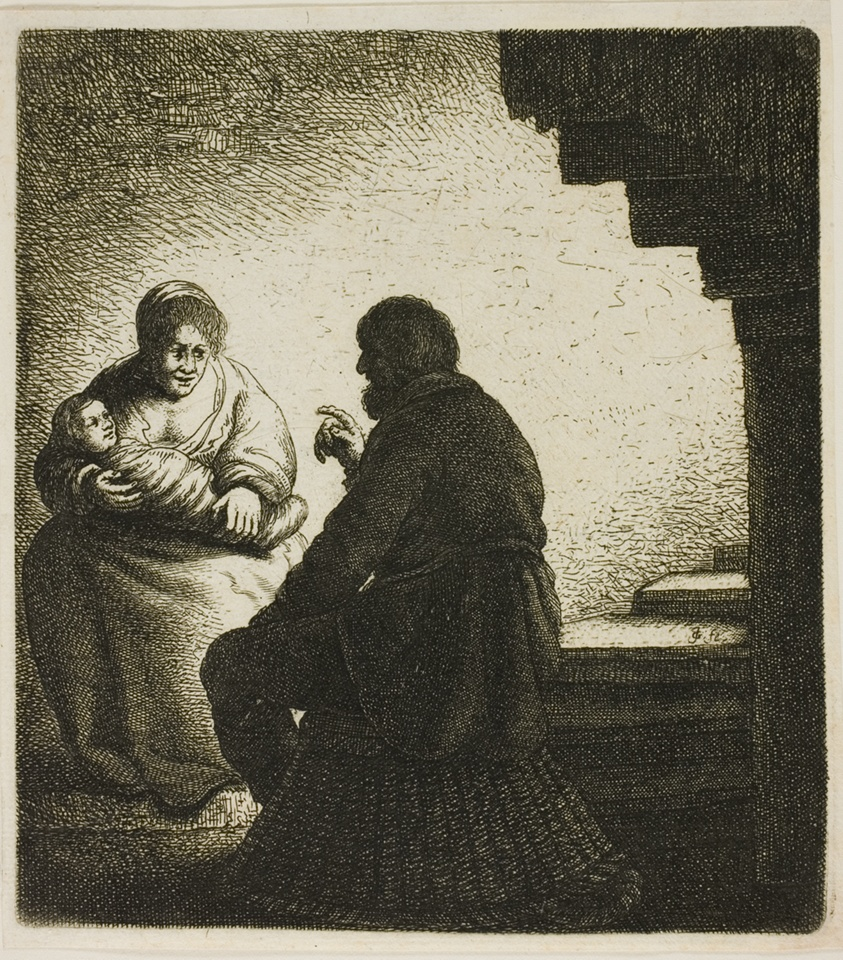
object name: Print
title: The Family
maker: Jan Georg van Vliet; Dutch, c. 1610-after 1635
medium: Etching on paper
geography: Holland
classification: etching; print; prints and drawing